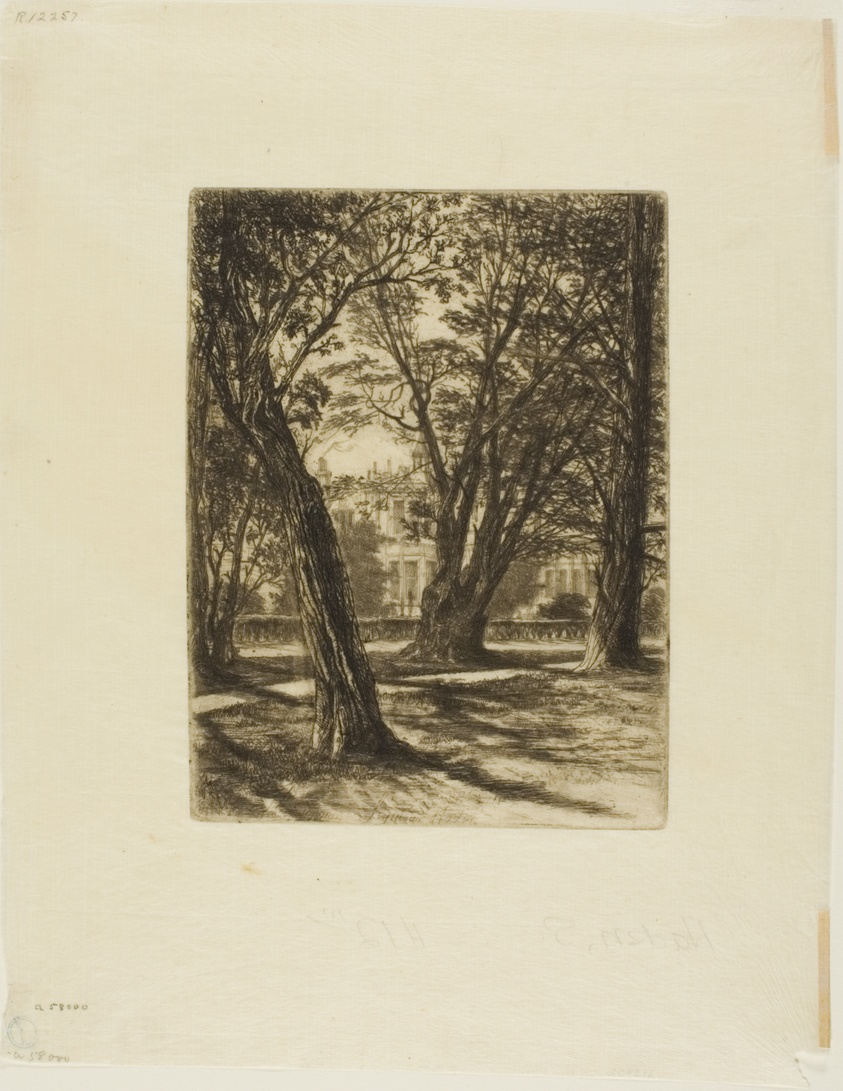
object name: Print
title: Kensington Gardens, No. I (small plate)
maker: Francis Seymour Haden (English, 1818-1910)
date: 1859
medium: Etching on cream Japanese paper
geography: England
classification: etching; print; prints and drawing